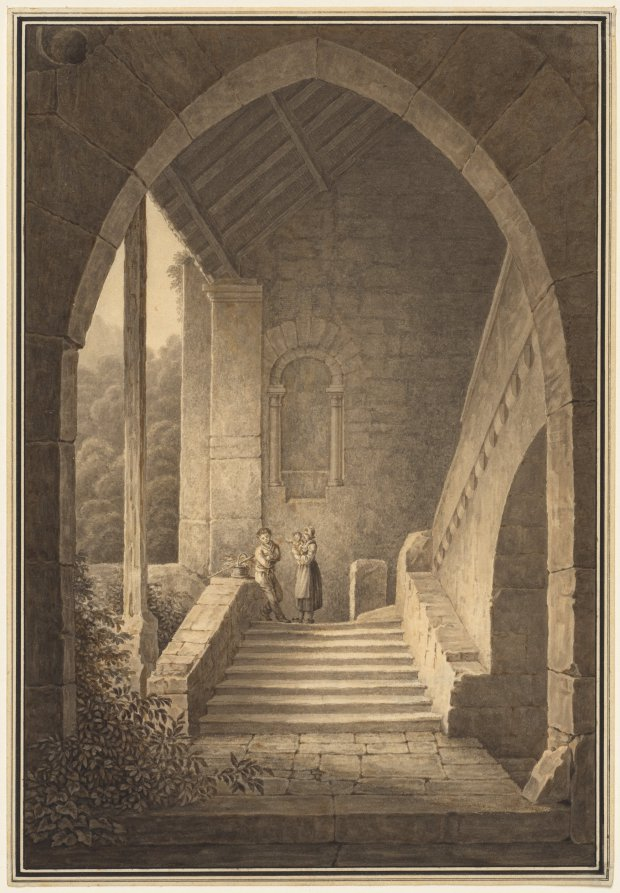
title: Outer Staircase of a Gothic Ruin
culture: Germany, 19th century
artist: Domenico Quaglio (German, 1787–1837)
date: 1830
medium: gray and brown wash and framing lines in pen and black ink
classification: Drawing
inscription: signed, on verso, at lower right, in graphite: D. Quaglio f. in Decbr. 1830; inscribed, at lower left, in graphite: Domenico Quaglio d. F. [paraph: ey?] / 1786-1837; inscribed, at lower center, in graphite: Ansicht einer Ruine in / Meillerie Villaneuve des / gez. Dez. 1830; inscribed, at lower right, in graphite: Linken Ufer des Genfer see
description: Rejecting the preference for the landscape and architecture of Italy, as seen in the work of many of his contemporaries, Domenico Quaglio portrayed the buildings of his native Germany. Here, Quaglio depicted a man, woman, and child who are dwarfed by the immense scale of a Gothic cathedral’s ruined arch, within which the figures appear. Overrun by vines and set within a dense forest, the architecture signifies the magnitude of God in the Christian faith and the smallness of mankind.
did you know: Gothic architecture, the type seen in this drawing, was associated with Germany based on a false assumption that a Germanic tribe, the Goths, had originated the style.